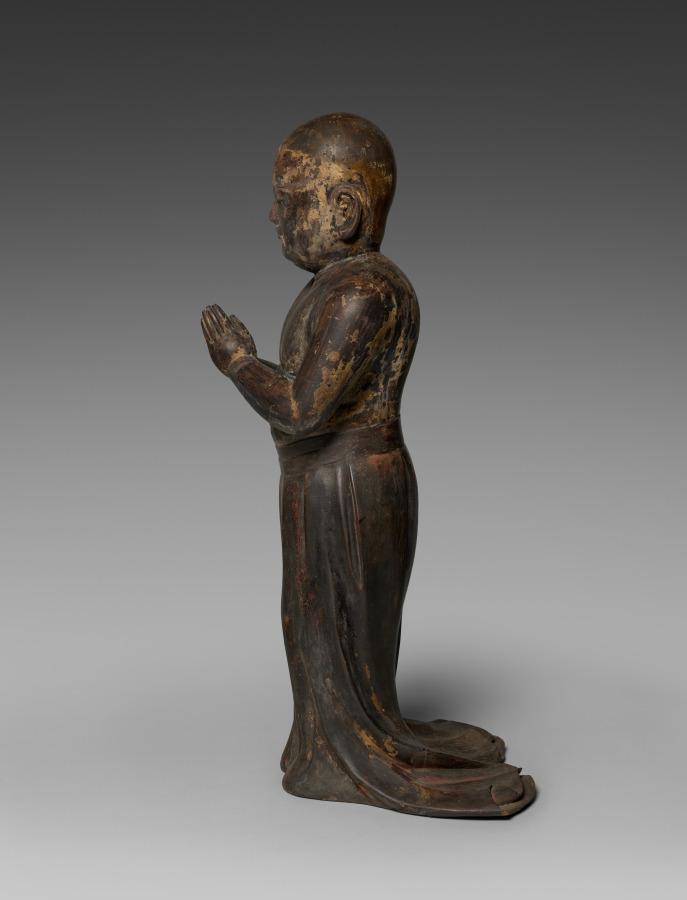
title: Prince Shōtoku at Age Two (Shōtoku Taishi)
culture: Japan, Kamakura period (1185–1333)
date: early 1300s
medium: Wood with lacquer, color, and rock-crystal inlaid eyes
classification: Sculpture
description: Two-year old Prince Shōtoku (573?–622?) places his palms together in a gesture called gasshō. Shōtoku played a major role in the introduction of Buddhism to Japan, and devotees of the prince commissioned painted and sculpted images commemorating important moments of his life. At age two, the prince faced east and chanted the name of the Buddha without having been taught the practice. This sculpture captures the fantastic event foreshadowing his future acts.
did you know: Shōtoku Taishi had several titles. One translates to "the prince of the stable door" because he was said to have been born in the imperial stables.